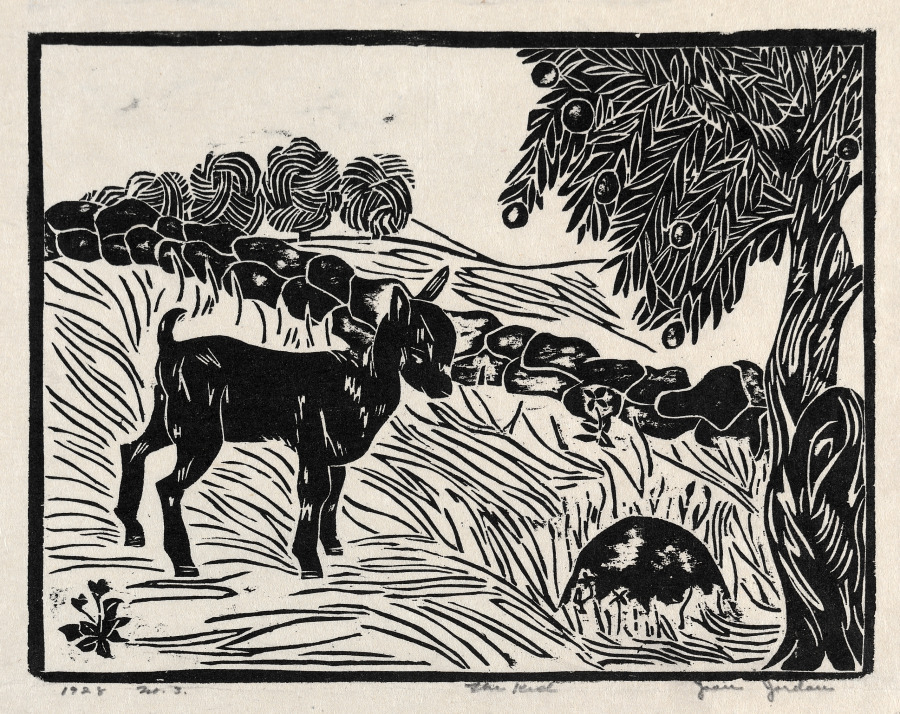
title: The Kid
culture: America, Ohio, Cleveland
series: 2527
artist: Joan Jordan (American)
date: 1928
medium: linoleum cut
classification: Print